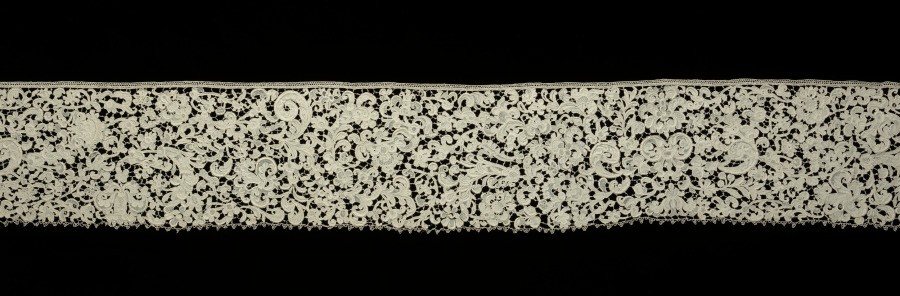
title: Lace Flounce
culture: Italy, Venice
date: 1600s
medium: Linen: needle lace (Venetian raised point)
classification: Lace